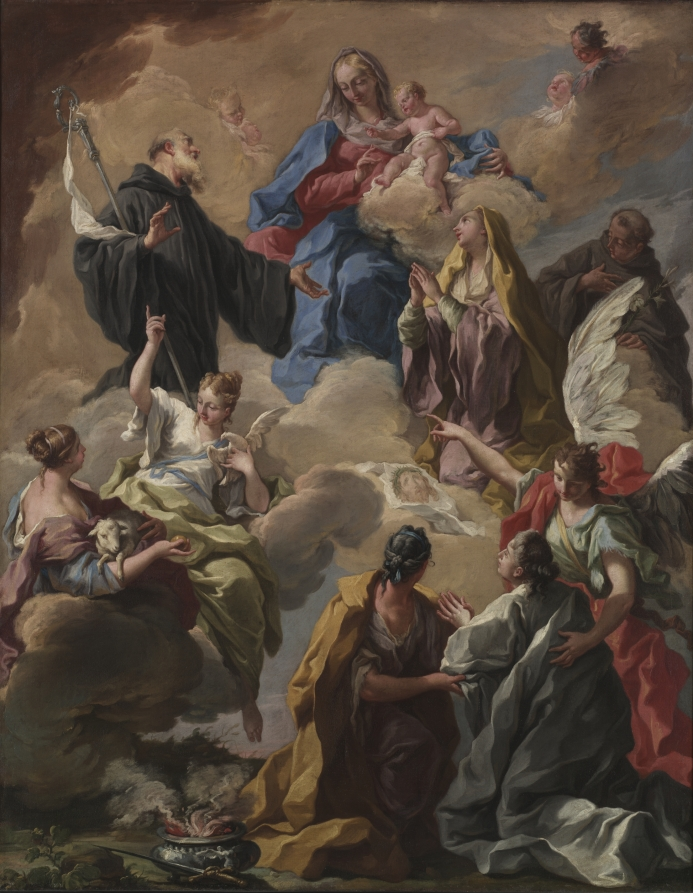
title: Saints Presenting a Devout Woman to the Virgin and Child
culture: Italy, 18th century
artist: Giovanni Battista Pittoni (Italian, 1687–1767)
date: 1720s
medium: oil on canvas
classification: Painting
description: A devout woman, shown at lower right, is presented by saints and an angel to the central Virgin and Child. In clockwise order from her is Saint Lucy, identified by the cauldron and sword at her feet; Saint Agnes, by the lamb; Saint Scholastica, by the dove she holds; and Saint Benedict, characterized by his crozier and Benedictine habit. Slightly below the central Madonna is Saint Veronica, whose head is covered. Behind Saint Veronica, Saint Anthony of Padua, wearing a Franciscan habit and holding a lily stalk, stands in a pose of adoration. Below Saint Anthony and next to the woman is an angel. The identity of the woman is uncertain, but she may be the painting's patron. Pittoni uses dramatic gestures and elegant drapery, while the soft treatment of light and rich colors reflect Pittoni's study of French Rococo art during his stay in France in 1720. In the crowded composition, Pittoni has emphasized the importance of the religious event. His experimentation with composition is evident in the legs of Saint Agnes's lamb; as the painting has aged, a third front leg that Pittoni had painted over has become visible.